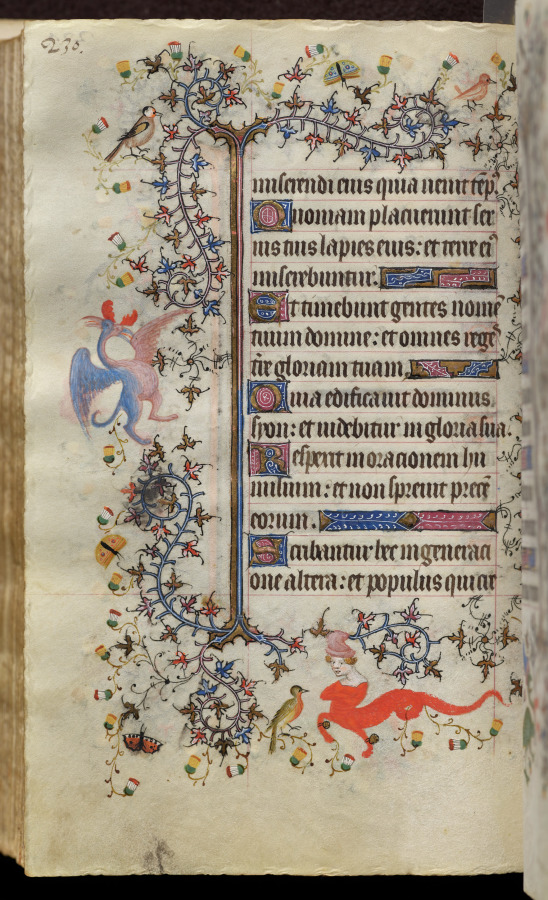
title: Hours of Charles the Noble, King of Navarre (1361-1425): fol. 115v, Text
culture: France, Paris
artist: Master of the Brussels Initials and Associates (French)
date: c. 1405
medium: ink, tempera, and gold on vellum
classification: Bound Volume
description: This precious volume was obviously highly prized by its owner, the French-born King of Navarre, who had his coat of arms painted on no less than twenty folios. Rather than directly commissioning this manuscript from a specific workshop, it seems that Charles the Noble acquired his book of hours -- perhaps ready-made for the luxury market -- while on a trip to Paris in 1404-05. A collaborative effort, six painting styles are evidenced within the pages of this codex, those of two Italians, two Frenchmen, and two Netherlanders. The painter who was responsible for the planning and decoration of the book, and who produced seventeen of the large miniatures, was a Bolognese artist known as the Master of the Brussels Initials. His principal assistant, responsible for most of the borders, was a Florentine who signed his name "Zecho" da Firenze on folio 208 verso.